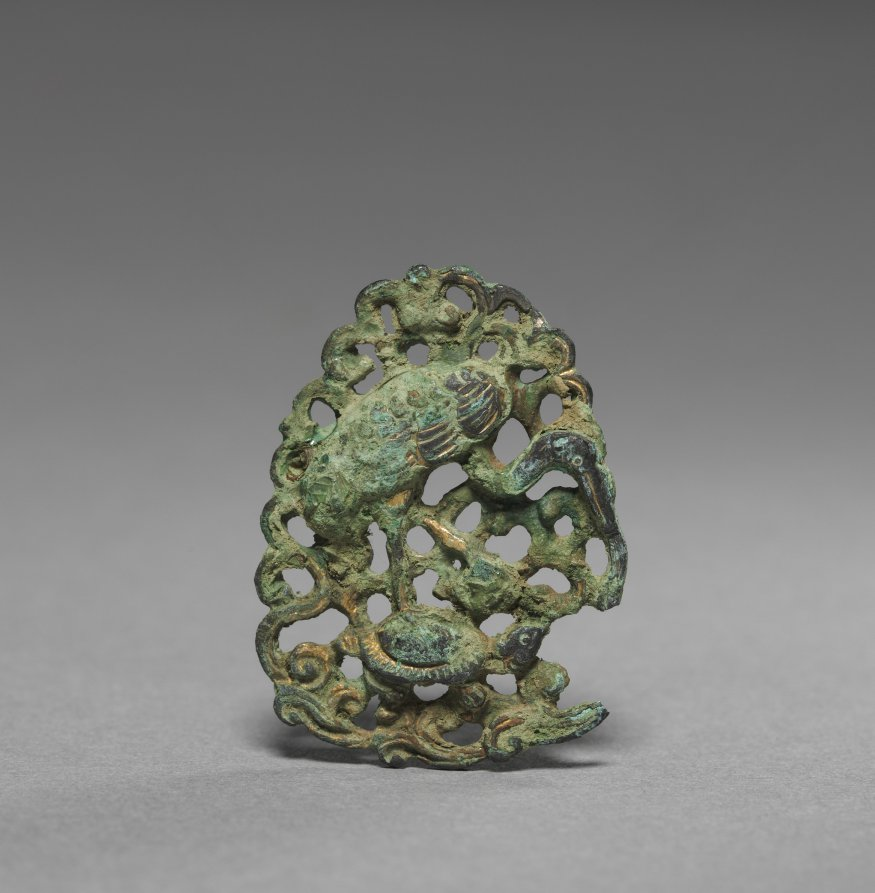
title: Ornament with Heron and Turtle Design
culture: Korea, Goryeo dynasty (918–1392)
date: 1100s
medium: bronze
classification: Metalwork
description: Metalworking techniques advanced remarkably during the Goryeo period (918–1392). Sophisticated metal objects with intricate designs were used not only as daily accessories, but also as burial goods for commemorating the dead. Traces of fibers found on the backs of these metal ornaments suggest that they were once used as brooches to hold garments together.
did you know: This metal ornament is part of a decorative brooch once used to hold clothes together.